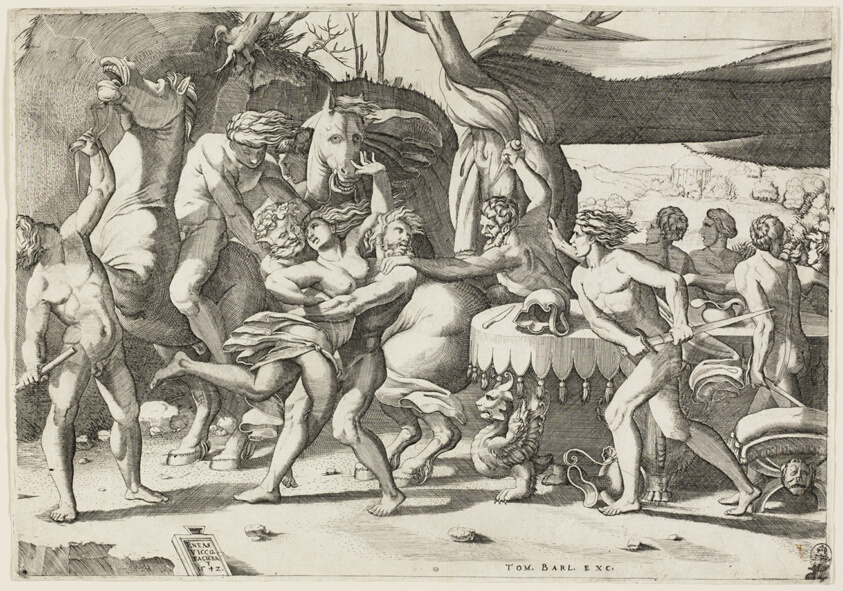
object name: Print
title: Combat of the Lapiths and Centaurs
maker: Enea Vico (Italian, 1523-1567)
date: 1542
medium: Engraving in black on ivory laid paper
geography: Italy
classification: engraving; print; prints and drawing